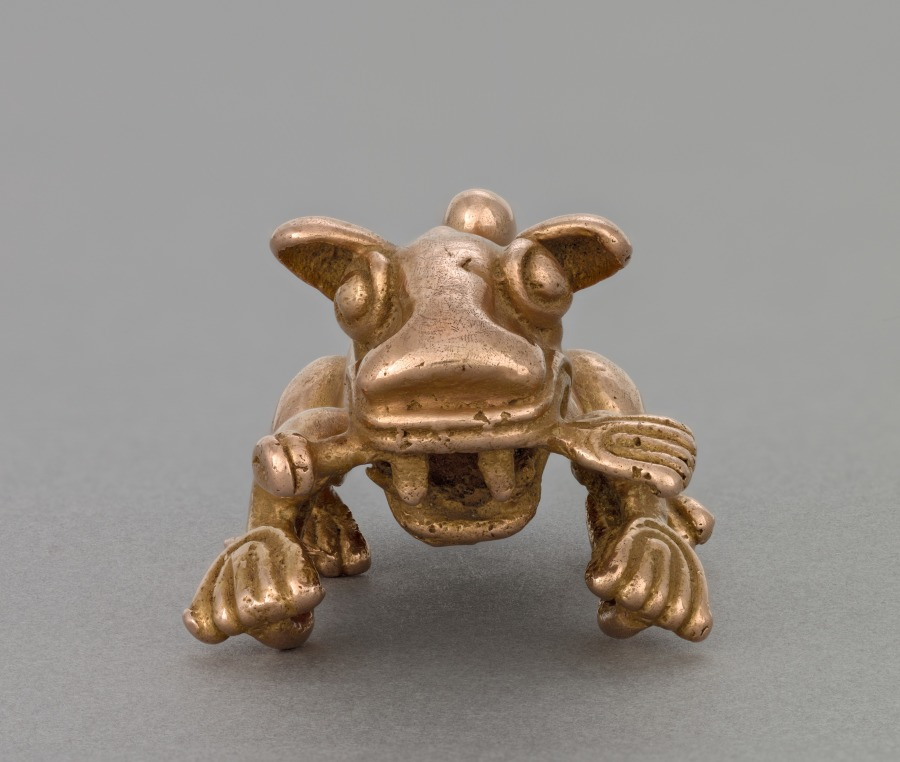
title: Feline Pendant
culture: Isthmian Region, Panama-Costa Rica, Veraguas-Chiriquí style, 11th century-16th century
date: 1000–1550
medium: gold, cast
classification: Metalwork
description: This memorable jaguar pendant is a nasty precious—nasty because it holds a severed limb (probably human) in its fanged mouth but precious due to its material, its well-polished silky surface, and the charming rendering, which reduces the jaguar to cartoon-like essentials. The warm, rosy color is the result of copper in the alloy.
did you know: In the Panama-Costa Rica region gold ornaments were associated with political and religious authority.